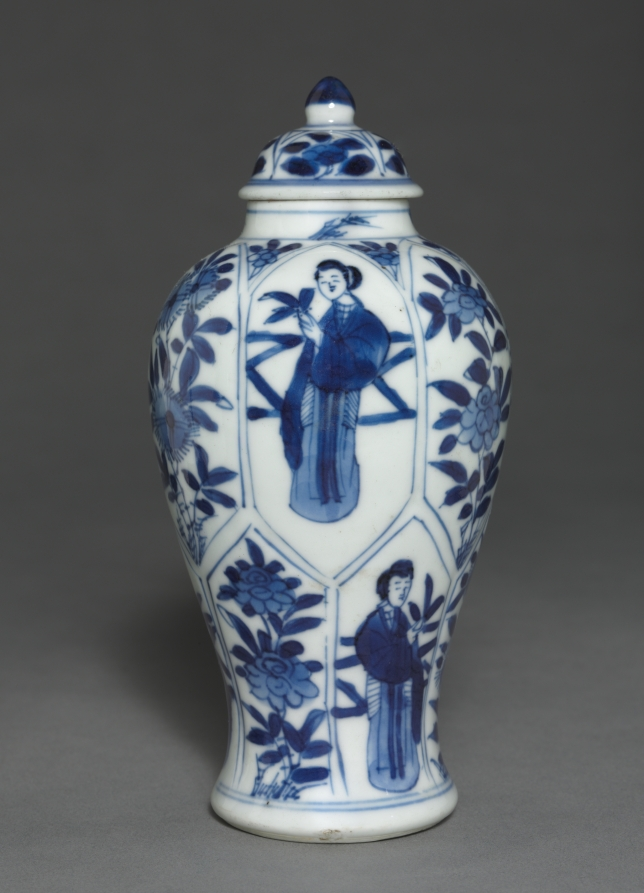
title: Jar with Cover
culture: China, Qing dynasty (1644-1911)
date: 19th Century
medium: porcelain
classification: Ceramic